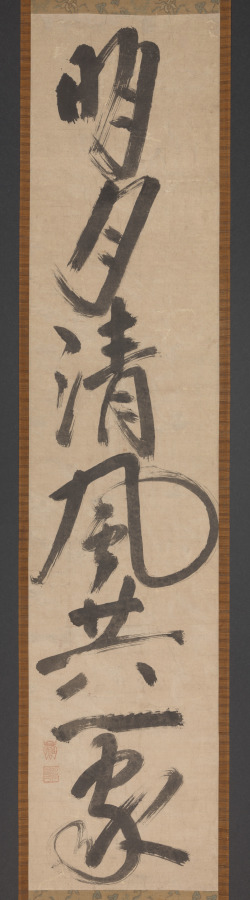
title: Single-column Calligraphy (Bright Moon and Fresh Breath as One . . . )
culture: Japan, Muromachi period (1392–1573)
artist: Motsurin Jōtō (Japanese, d. 1492)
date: 1400s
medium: hanging scroll; ink on paper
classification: Calligraphy